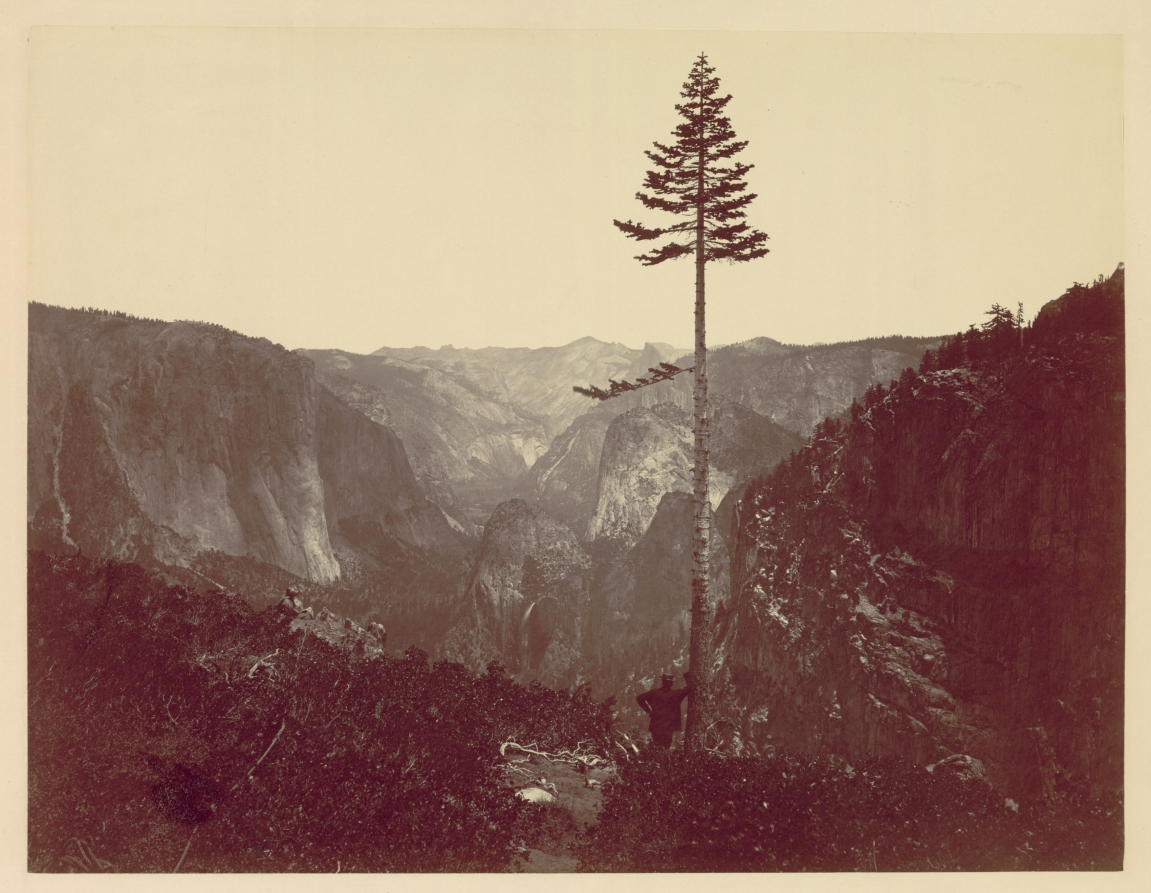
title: Yosemite Valley from Mariposa Trail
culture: America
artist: Charles Leander Weed (American, 1824–1903)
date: c. 1865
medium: mammoth albumen print from wet collodion negative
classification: Photograph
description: In 1859, Charles L. Weed made the first photographs of the wild and breathtakingly beautiful Yosemite region in California. These pioneering photographs spoke of the area's splendors to future visitors and artists. Probably five years later, he returned to Yosemite to begin creating his remarkable mammoth plate views (roughly 17x22 inches). This celebrated vista of the distant, mountainous, forest scene is the best known of Weed's modest production of large-scale photographs. The serenity and order of the composition is punctuated by an isolated, spindly tree perched at a cliff's edge, asymmetrically dividing the composition while uniting the blank sky with the mountainous landscape below. The figure leaning against the tree in the foreground gives scale to the scene and suggests human isolation in the vastness of nature.